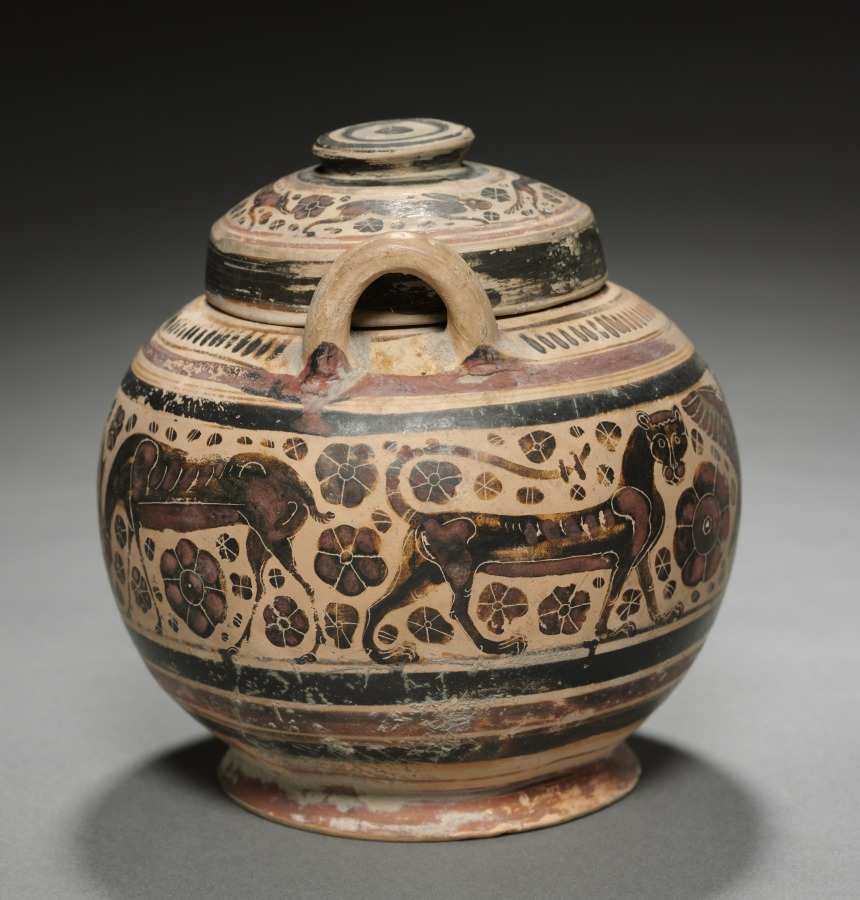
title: Black-Figure Pyxis (Cylindrical Lidded Box): Animals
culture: Greek, Corinthian (Middle-Late)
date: 500s BCE, with modern painting and incision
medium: ceramic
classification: Ceramic